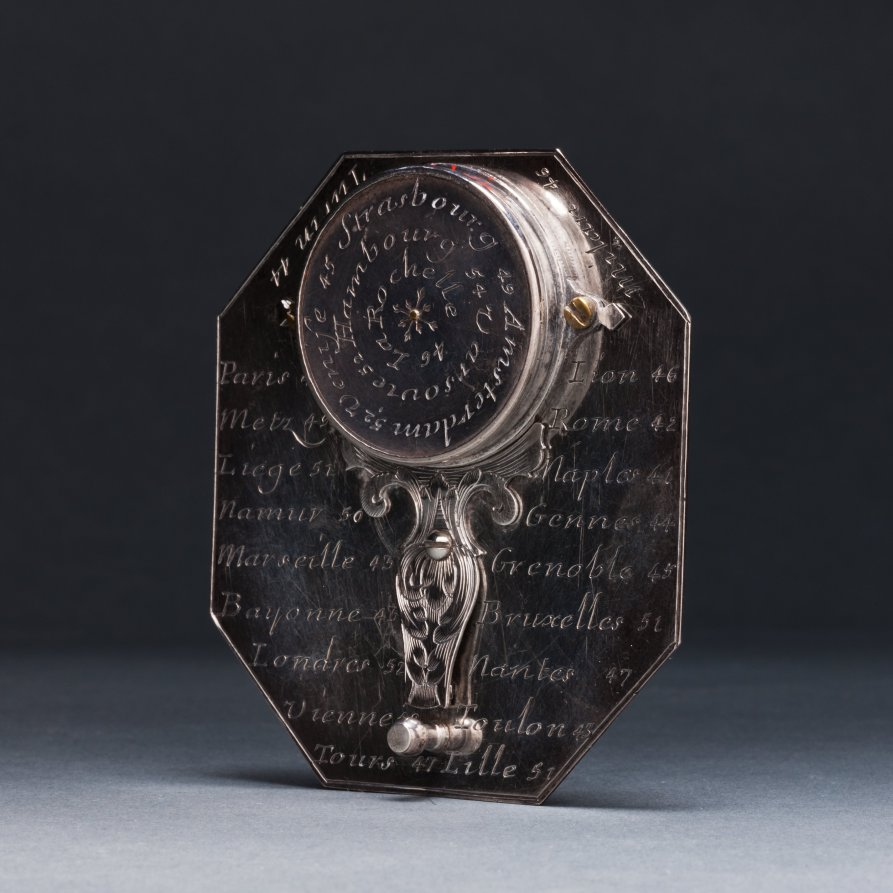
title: Butterfield Sundial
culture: France, 18th century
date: 1700s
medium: silver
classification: Silver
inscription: [Engraved signature above the compass in ribbon band]: "N. BION A Paris"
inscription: [Engraved on the face of the sundial]: “Pour 55° 4-5-6-7-8-9-10-11 50° IIII-V-VI-VII-VIII-IX-X-XI 45° 5-6-7-8-9-10-11 40° -VI-VII-VIII-IX-X-XI'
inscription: [Engraved on the other side]: "Pour 55° -8-7-6-5-4-3-2-1-0 50°-VIII-VII-VI-V-IIII-III-II-I 45°-8-7-6-5-4-3-2-1 40°-VII-VI-V-IIII-III-II-I"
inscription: [Engraved around the compass]: “NORD-OUEST-SUD-EST”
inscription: [Engraved on the back of the sundial]: “Turin 44 Milan 46 Paris 49 Lion 46 Metz 49 Rome 42 Liege 51 Naples 44 Namur 50 Gennes 44 Marseille 43 Grenoble 45 Bayonne 43 Bruxelle 51 Londres 52 Nantes 47 Vienne 48 Toulon 43 Tours 47 Lille 51”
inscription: [Engraved around the back of the compass]: “Venise 45 Strasbourg 49 Amsterdam 52 Hambourg 54 Varsovie 52 La Rochelle 46”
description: Butterfield-type sundials are characterized by their adjustable gnomons, metal flaps that cast a shadow on the dial’s face to indicate the hour, and geographical indices. This sundial has a scale adjustable between latitudes of 40° to 60° north. The latitudes of 26 European towns are engraved on its back for quick reference. With an intricately engraved silver face, it would have functioned as a fashionable traveler’s accessory.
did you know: Butterfield-style sundials were named after Micheal Butterfield, an English scientific and mathematical instrument maker who worked in Paris between 1674 and 1724.